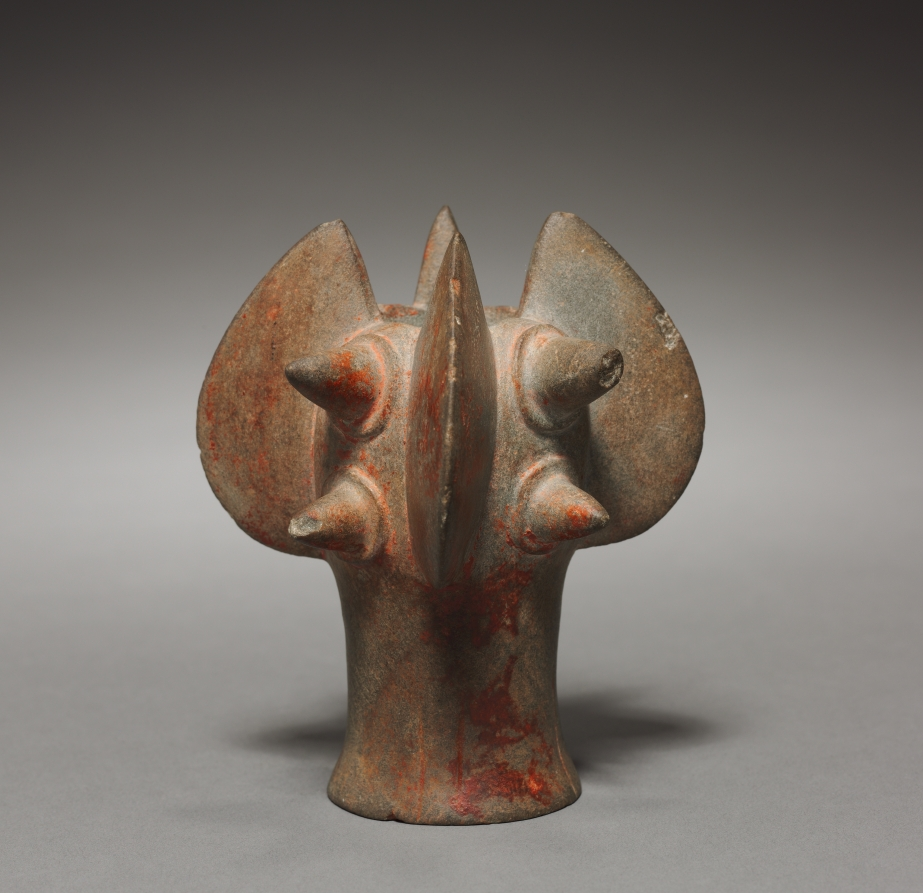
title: Mace Head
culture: North coast of Peru, Salinar culture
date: c. 200 BCE–100 CE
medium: stone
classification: Stone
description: This handsome object was slipped onto a wooden shaft to form a mace, a club-like weapon used in war. It is unclear, however, whether the ancients used examples as well carved as this one in anything but ceremonial circumstances.